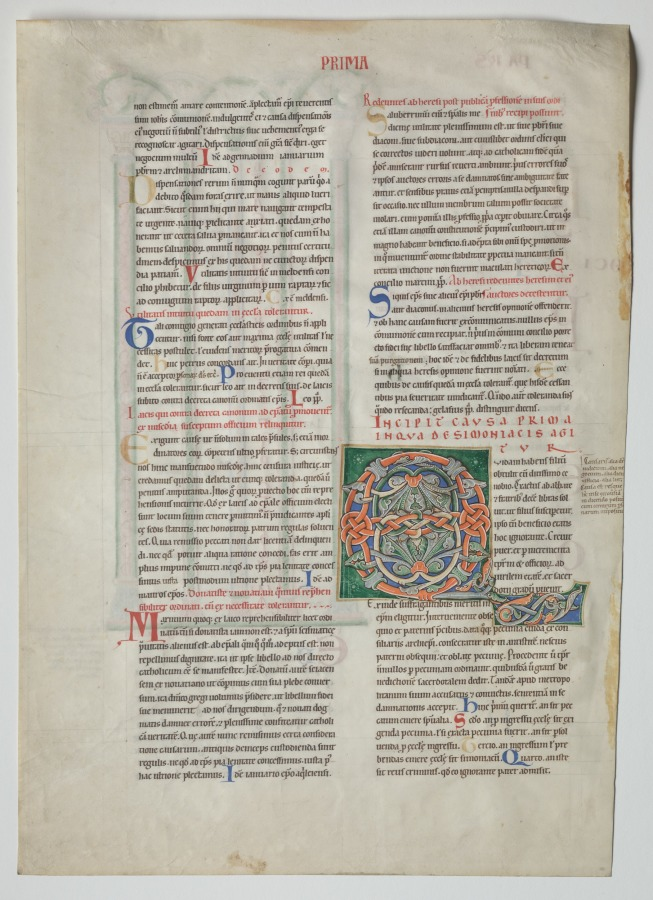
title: Single Leaf from a Decretum by Gratian: Decorated Initial Q[uidam habens filium obtulit] and Quadruple Arcade with Concordance of Greek and Latin Alphabets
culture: France, Burgundy, Archdiocese of Sens, Abbey of Pontigny, 12th century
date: c. 1160–1165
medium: ink and tempera on vellum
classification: Manuscript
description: This leaf was excised from a copy of the handbook of church law known as the Decretum written by Gratian, an Italian Camaldolese monk active in Bologna from about 1130 to 1140. The focus of the leaf is a large decorated letter Q with spiraling lotus petals introducing the first Causa, or case of law. The text begins, "A man having a son offered him to a very wealthy cloister." This case concerns the definition of simony (making profit from sacred things). The style of the illumination and the script date the leaf to between 1160 and 1165. In November 1164, Thomas Becket, Archbishop of Canterbury, took refuge at Pontigny as a result of his conflict with King Henry II of England. During his stay, Becket immersed himself in the study of church law, as evidenced by his later use of citations from the Decretum. This leaf could have been part of the original manuscript Becket consulted. The volume was later dismembered following the suppression of the monastery during the French Revolution in the late 1700s.